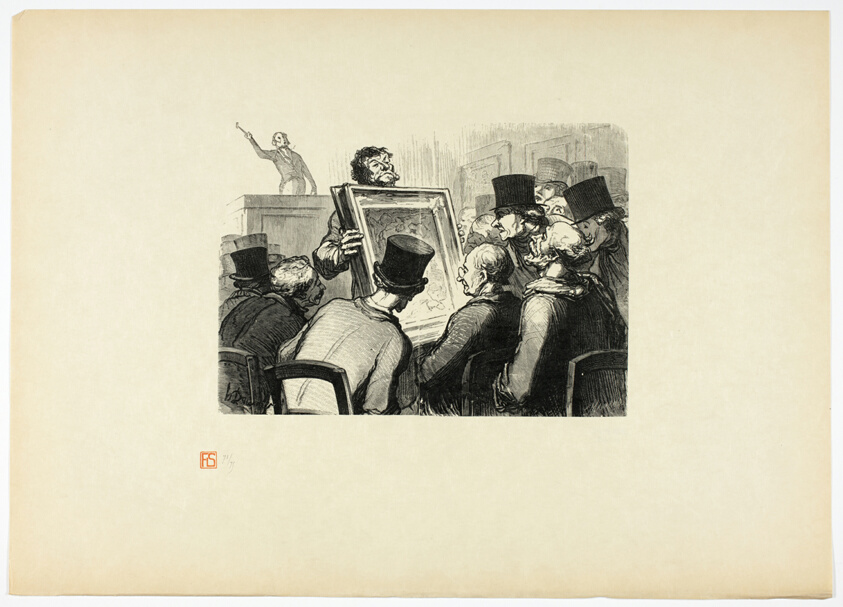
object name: Print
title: Les amateurs de tableaux à l'hôtel Bouillon, from Tirage Unique de Trente-Six Bois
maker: Charles Maurand (French, 1824-1904); after Honoré Victorin Daumier (French, 1808-1879); printed by François Louis Schmied (Swiss, 1873-1941); published by Jules Meynial (French, 20th century)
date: 1862, printed 1920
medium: Wood engraving on cream Japanese paper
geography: France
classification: wood engraving; print; prints and drawing